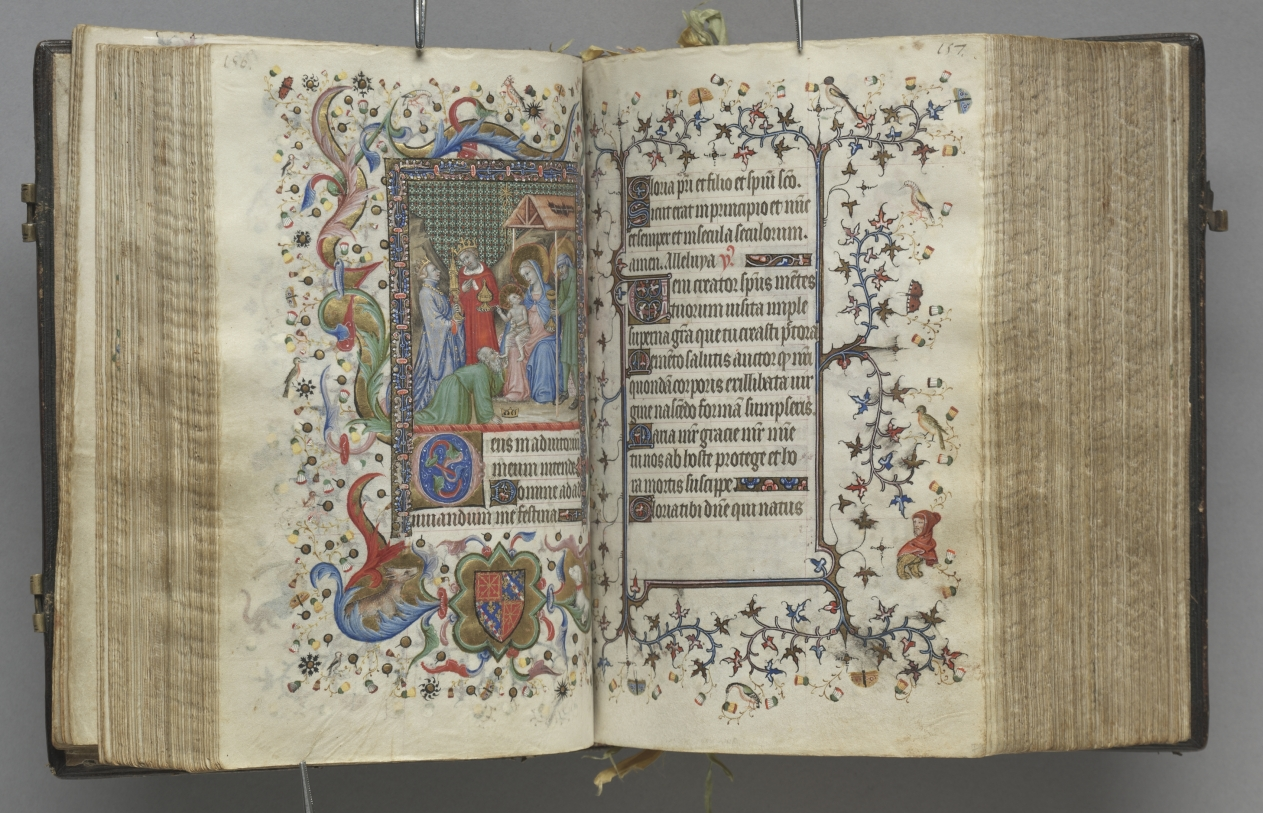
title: Hours of Charles the Noble, King of Navarre (1361-1425): fol. 79r, Text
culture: France, Paris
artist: Master of the Brussels Initials and Associates (French)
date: c. 1405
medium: ink, tempera, and gold on vellum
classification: Bound Volume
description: This precious volume was obviously highly prized by its owner, the French-born King of Navarre, who had his coat of arms painted on no less than twenty folios. Rather than directly commissioning this manuscript from a specific workshop, it seems that Charles the Noble acquired his book of hours -- perhaps ready-made for the luxury market -- while on a trip to Paris in 1404-05. A collaborative effort, six painting styles are evidenced within the pages of this codex, those of two Italians, two Frenchmen, and two Netherlanders. The painter who was responsible for the planning and decoration of the book, and who produced seventeen of the large miniatures, was a Bolognese artist known as the Master of the Brussels Initials. His principal assistant, responsible for most of the borders, was a Florentine who signed his name "Zecho" da Firenze on folio 208 verso.